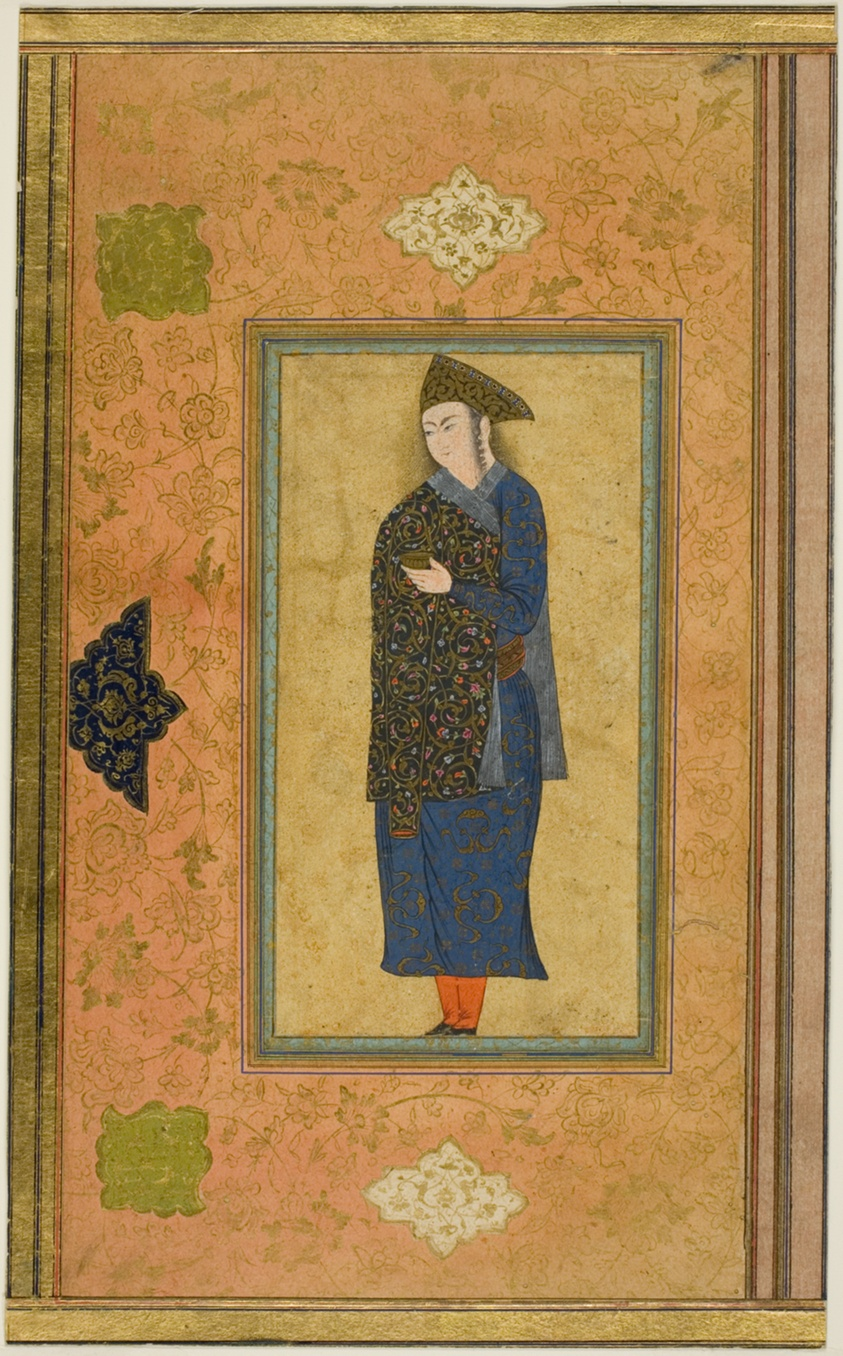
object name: Painting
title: Portrait of a Young Prince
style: isfahan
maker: Iran, Isfahan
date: Safavid dynasty (1501–1722), c.1600/1630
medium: Ink and color on paper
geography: Isfahan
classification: miniature painting; painting; asian art